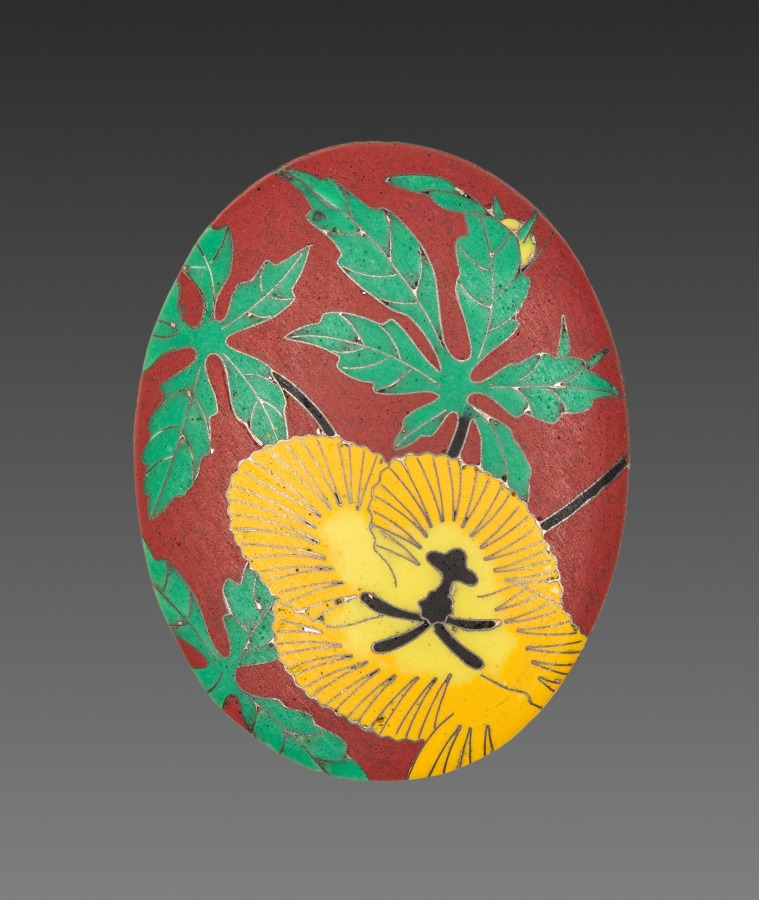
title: Locket Panel (2 of 4)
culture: France, 19th century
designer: Alexis Falize (French, 1811–1898)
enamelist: Antoine Tard (French, active 1860–1889)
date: 1800s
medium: gold and cloisonné enamel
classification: Jewelry